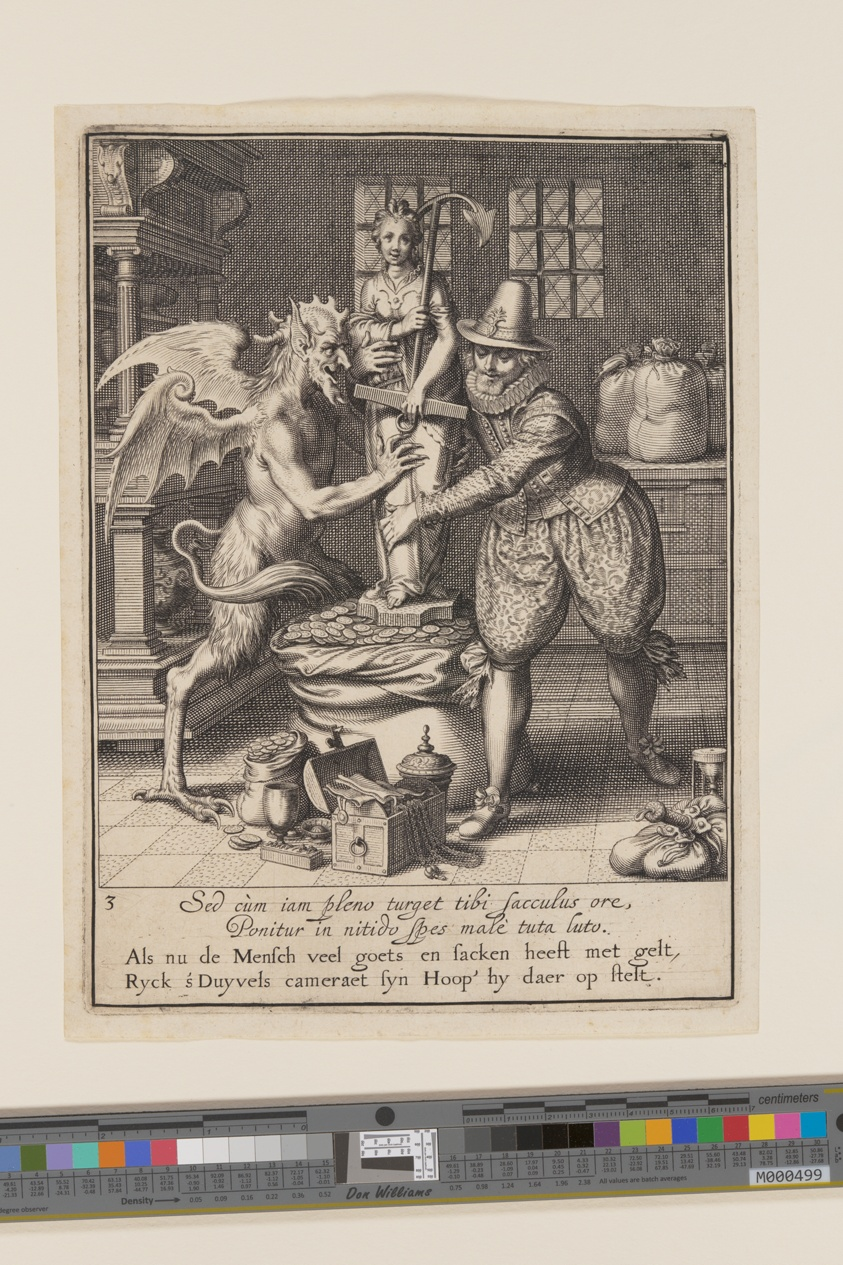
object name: Print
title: A Man and the Devil Filling a Sack with Money and Setting Up a Statue of Hope, from Allegory of the Misuse of Worldly Property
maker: Willem van Swanenburgh (Dutch, 1580–1612); after Maerten van Heemskerck (Dutch, 1498–1574)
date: 1609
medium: Engraving on ivory laid paper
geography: Netherlands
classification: engraving; paper; print; prints and drawing